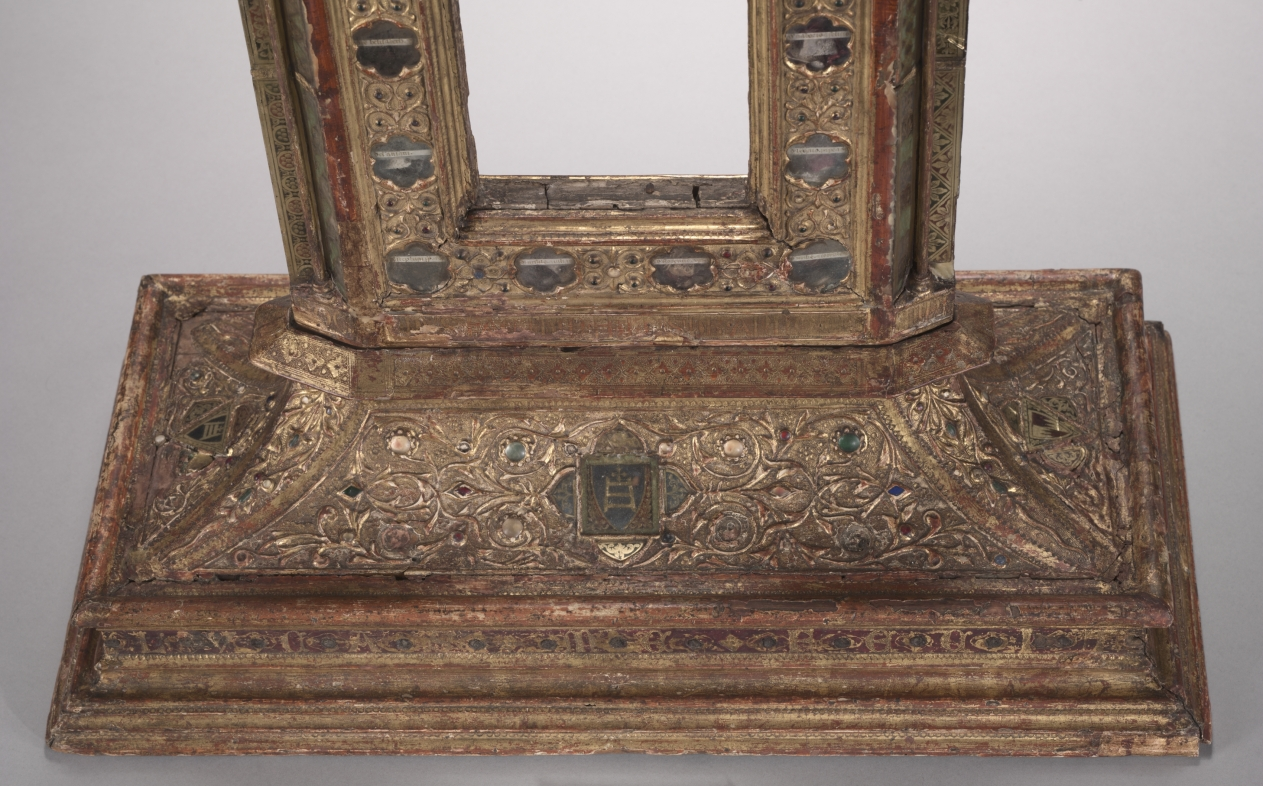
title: Frame for a Portable Reliquary Icon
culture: Italy, Siena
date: 1347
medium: gilded wood, modeled gesso, verre églomisé, glass cabochons, and relics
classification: Glass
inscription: an inscription with a stipled background runs around the lowest edge of the upright part of the frame: obverse: HOC/OPUS : FACTUM . FUIT . SUB . ANNO . DO/MINI; reverse: [small loss] /CCC . XLVII . TEMPORE . DOMINI . MINI/CINI. [This/work : has . been . made . under . year . of . the . Lord [small loss] /300 47 . in . the . time . of the Lord . Mini/Cini.] Another inscription appears on the obverse and reverse of the base: LUCAS ME FECIT. [Luke has made me.]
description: In the Middle Ages relics were thought to possess extraordinary power and were enshrined in lavish vessels called reliquaries. This complex frame once contained a painted image on each side, believed to be the Madonna and the Crucifixion, both long since lost. These images were surrounded by 17 carefully labeled relics, still visible. Intentionally portable, such votive objects could be easily carried from room to room or building to building as needed. A Latin inscription around the base reads: This work has been made under the year of the Lord CCCXLVII [1347] in the time of the Lord Mini/Cini. The inscription likely refers to Mino Cinughi, rector of the Hospital of Santa Maria della Scala in Siena, 1340-51. The Cinughi coat of arms as well as those of the hospital appear on the base. Another inscription, LUCAS ME FECIT (Luke made me), appears on both sides of the base. While this object probably resided on an altar in the hospital, the fact that it has two sides suggests it was carried aloft in processions.